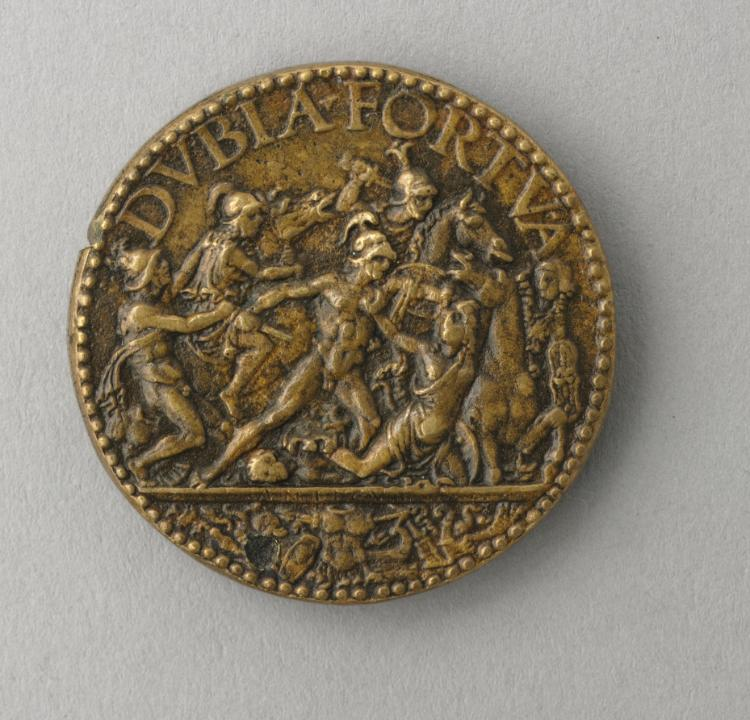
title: Dubia Fortuna (reverse)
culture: Italy, 16th century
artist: Antico (Italian, c. 1460–1528)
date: 16th century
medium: bronze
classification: Sculpture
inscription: DVBIA FORTV(n)A; signed on ground line: ANTICVS.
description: The inscription DUBIA FORTUNA is generally translated as"doubtful fortune," and speaks to the vagaries of war.